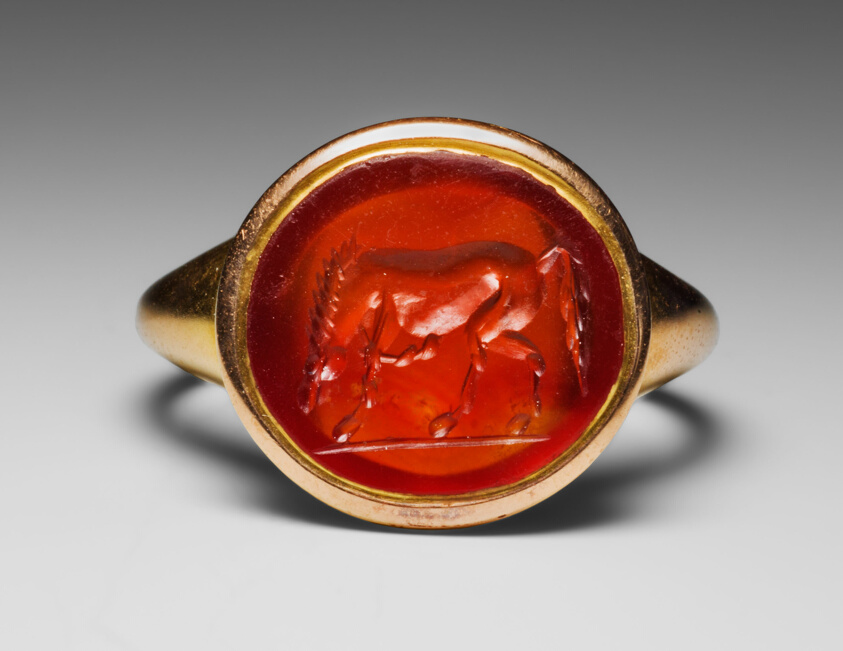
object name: Costume and Accessories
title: Intaglio Depicting a Horse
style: roman (ancient, style or period), ancient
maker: Roman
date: Intaglio: 1st century Setting: date unknown (modern)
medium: Intaglio: sardonyx Setting: gold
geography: Roman Empire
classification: ring (jewelry); semi-precious; stone; jewelry; ancient art; costume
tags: animals, beauty, rituals